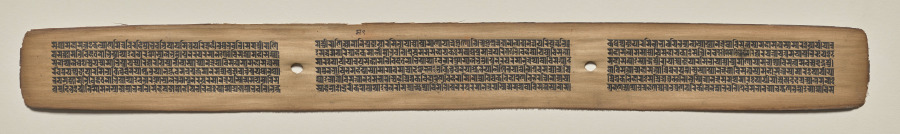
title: Text, Folio 147 (recto), from a Manuscript of the Perfection of Wisdom in Eight Thousand Lines (Ashtasahasrika Prajnaparamita-sutra)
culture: Eastern India, Bihar, Vikramashila Monastery. Painting: Nepal, Kathmandu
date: Sunday, September 14, 1119 (year 239 of the Newar Samvat in the month of Ashvina)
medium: gum tempera and ink on palm leaves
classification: Painting